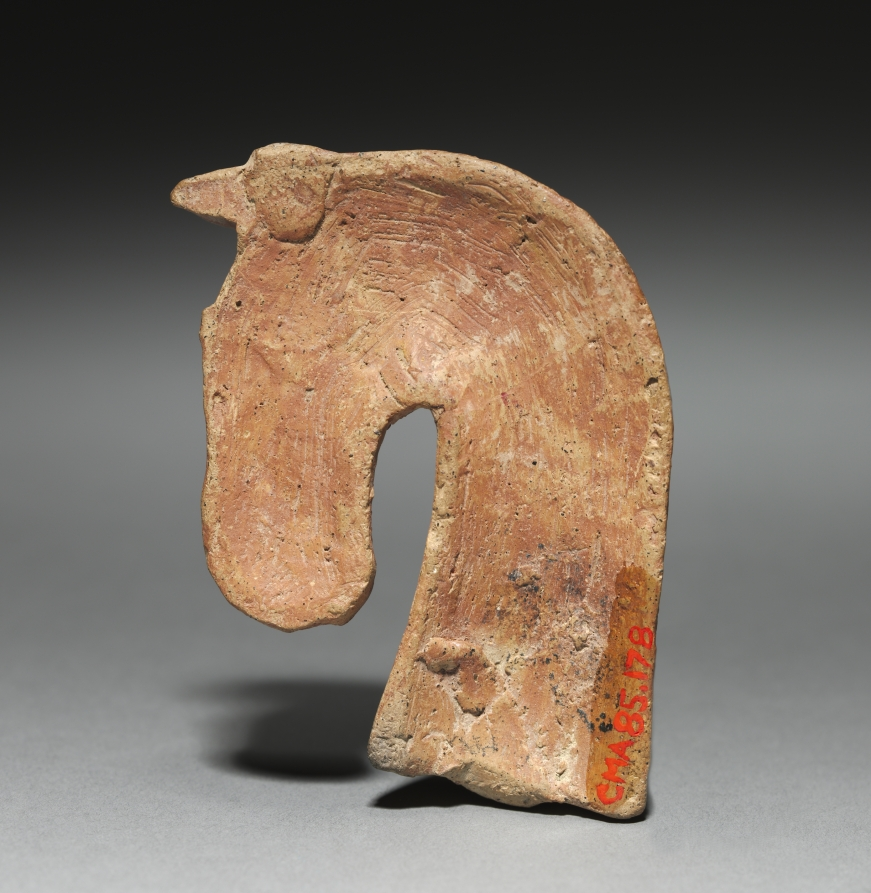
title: Horse Head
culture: Italy, Villanova, Etruscan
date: 700s BCE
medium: terracotta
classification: Ceramic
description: Probably mold-made, this terracotta horse head is finely modeled in high relief, its burnished surface embellished with carefully rendered details such as a textured mane and bared teeth.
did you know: The backside of this horse head is unworked.